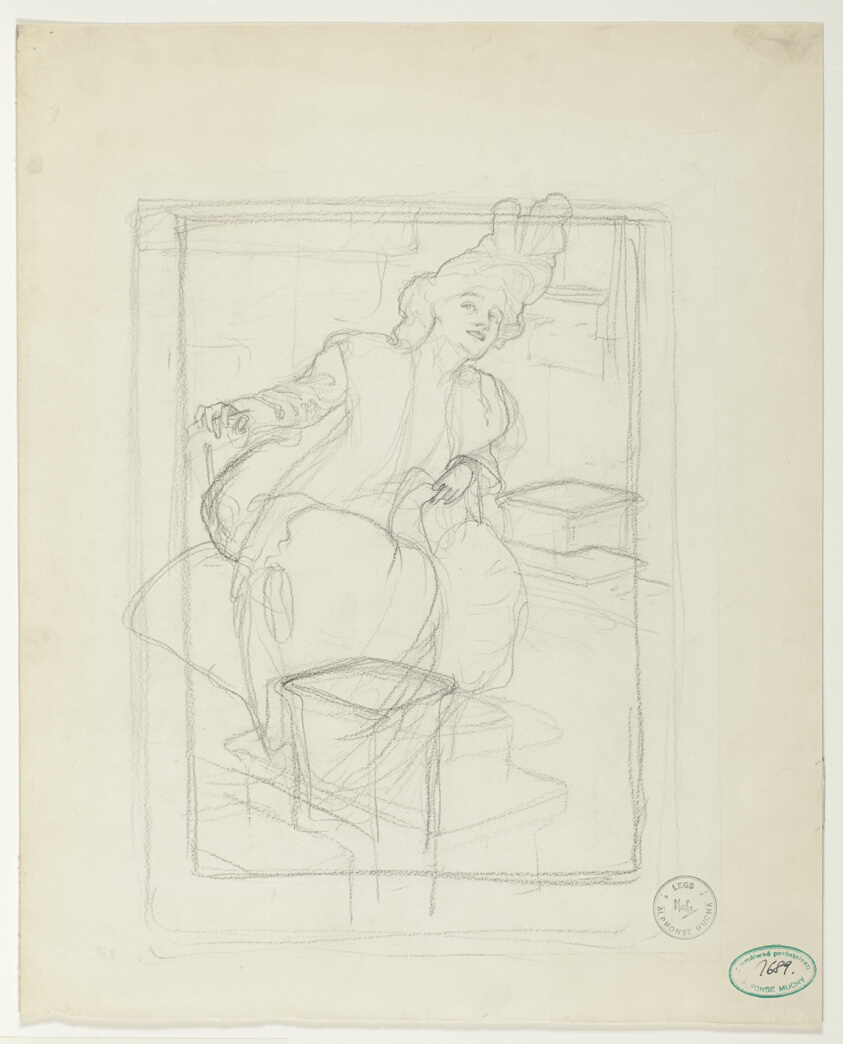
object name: Drawing and Watercolor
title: Sarah Bernhardt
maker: Alphonse Marie Mucha (Czech, 1860-1939)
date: c. 1898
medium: Black chalk on ivory wove paper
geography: Czech Republic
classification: chalk; drawings (visual works); prints and drawing